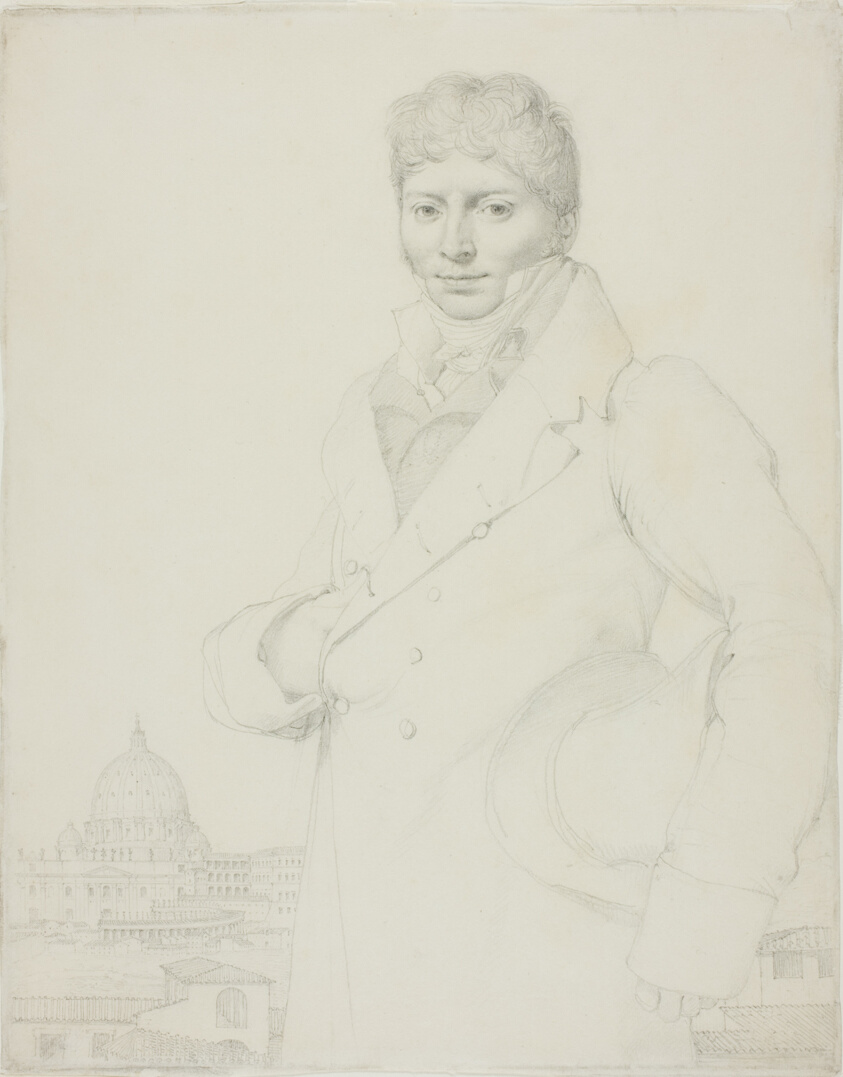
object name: Drawing and Watercolor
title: Portrait of Jean-Louis Robin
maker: Jean–Auguste–Dominique Ingres; French, 1780–1867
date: c. 1810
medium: Graphite, with stumping, on ivory wove paper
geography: France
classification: graphite; drawings (visual works); prints and drawing